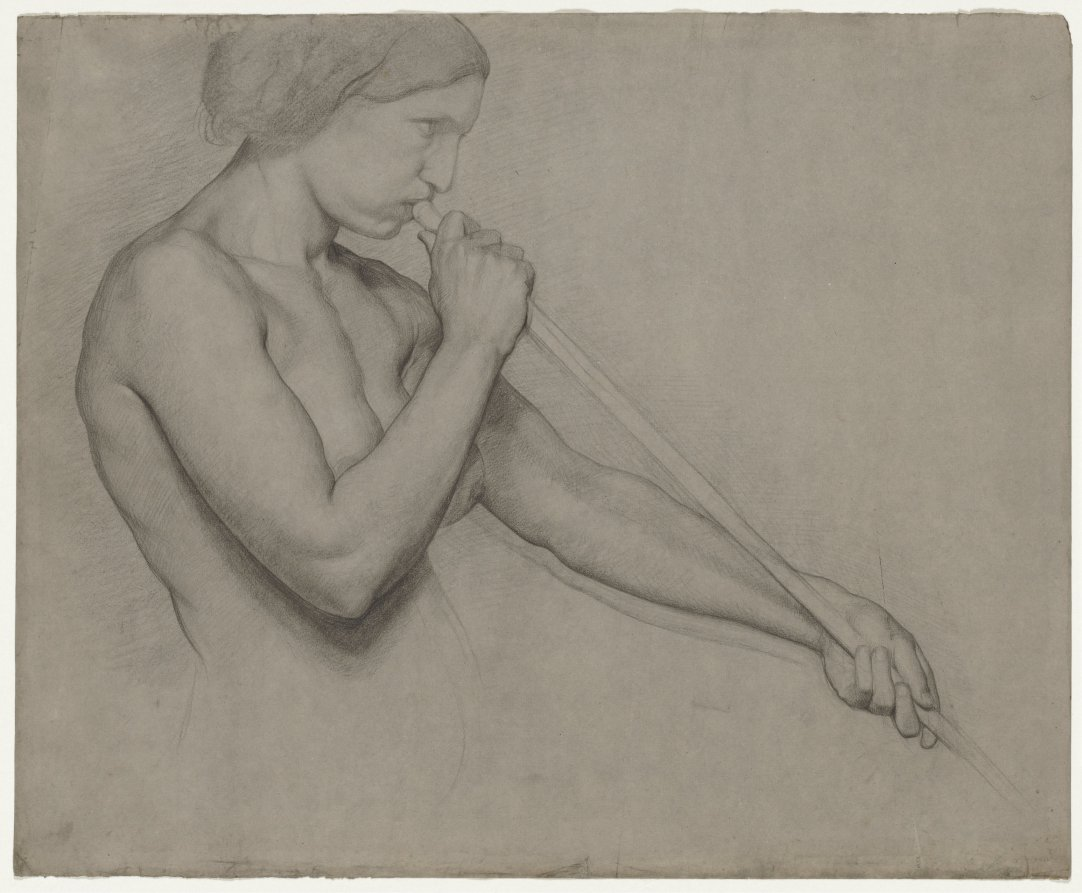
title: Angel Blowing a Trumpet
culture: France, 19th century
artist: Edgar Degas (French, 1834–1917)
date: 1857–59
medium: black chalk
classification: Drawing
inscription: verso, lower right, in graphite: 43 53 / 93 99 [underlined] / 65 75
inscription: lower right, in graphite: [illegible] ppl[illegible] [sumi?] [natural?] T A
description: The figure in this drawing closely resembles a number of trumpeting angels in drawings that Edgar Degas made between 1856 and 1858 in preparation for an ambitious but ultimately unrealized history painting on the subject of Saint John the Evangelist accompanied by an angel. Rather than referring to any single passage in the Book of Revelation, Degas distilled an image from passages describing seven trumpeting angels who unleash destruction on earth with their blasts, the voice of Christ that addresses John in loud tones "like a trumpet," and individual angels who lead and instruct the Evangelist.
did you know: Related studies suggest that the subject is a male model; Degas added breasts almost as an afterthought.